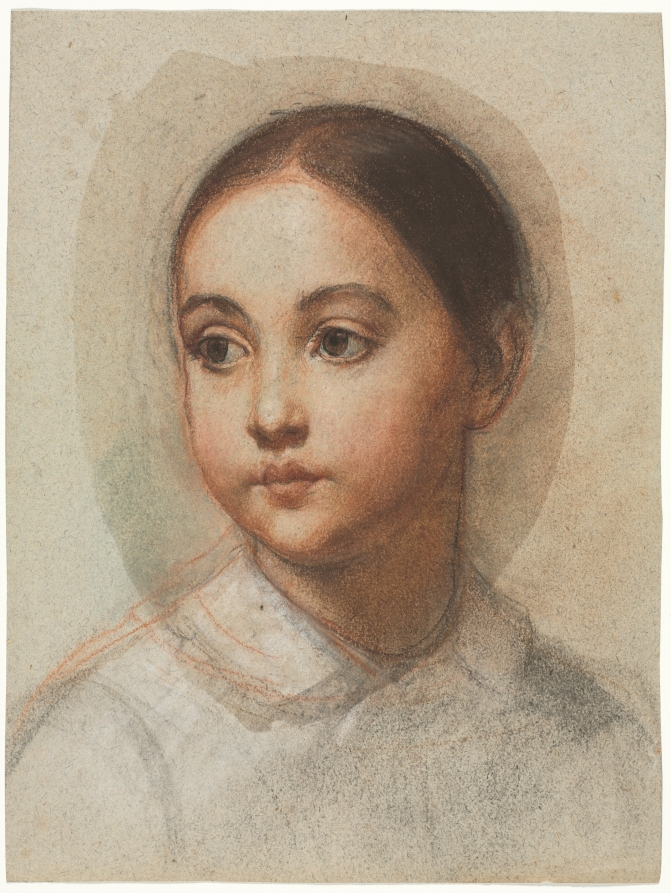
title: Head of a Young Girl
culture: France, 19th century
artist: Alexandre Hesse (French, 1806–1879)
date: c. 1857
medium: black chalk, sanguine, brown wash with white chalk heightening on coarse gray paper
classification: Drawing